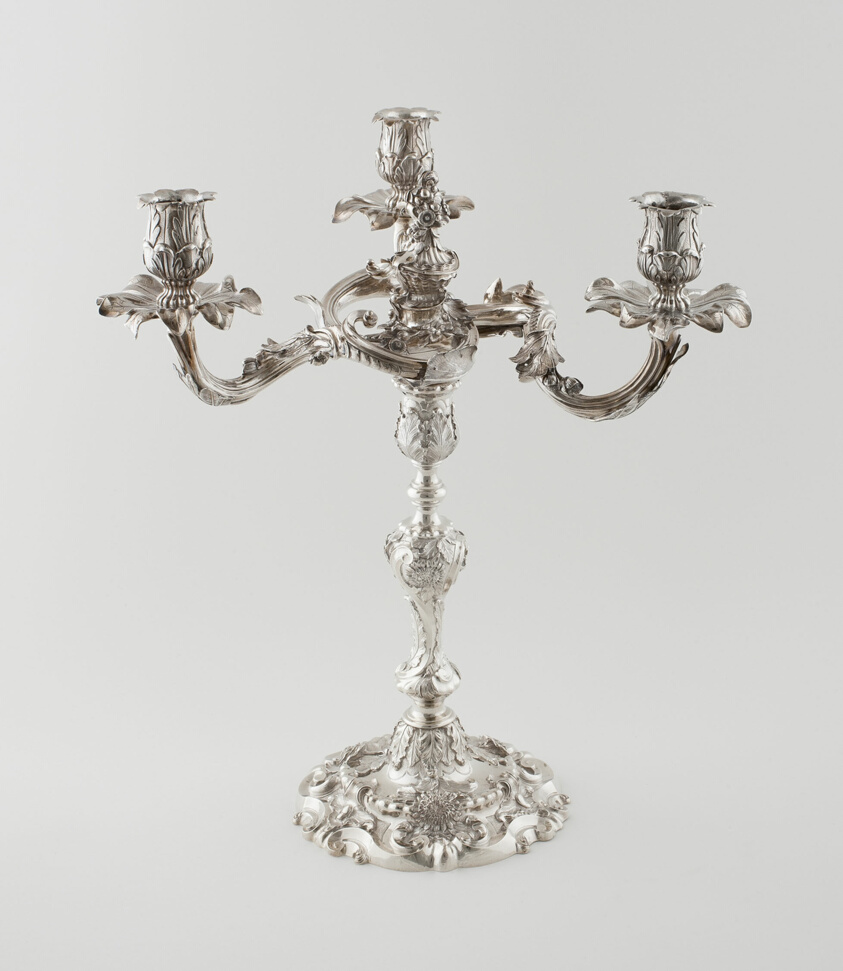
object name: Metalwork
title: Pair of Candelabra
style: Rococo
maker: England, London; James Paltro (English, active 1739-c. 1758)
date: 1757/58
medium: Silver, cast and chased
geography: London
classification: candleholder - candelabra; candleholder; silver; metalwork; european decorative arts